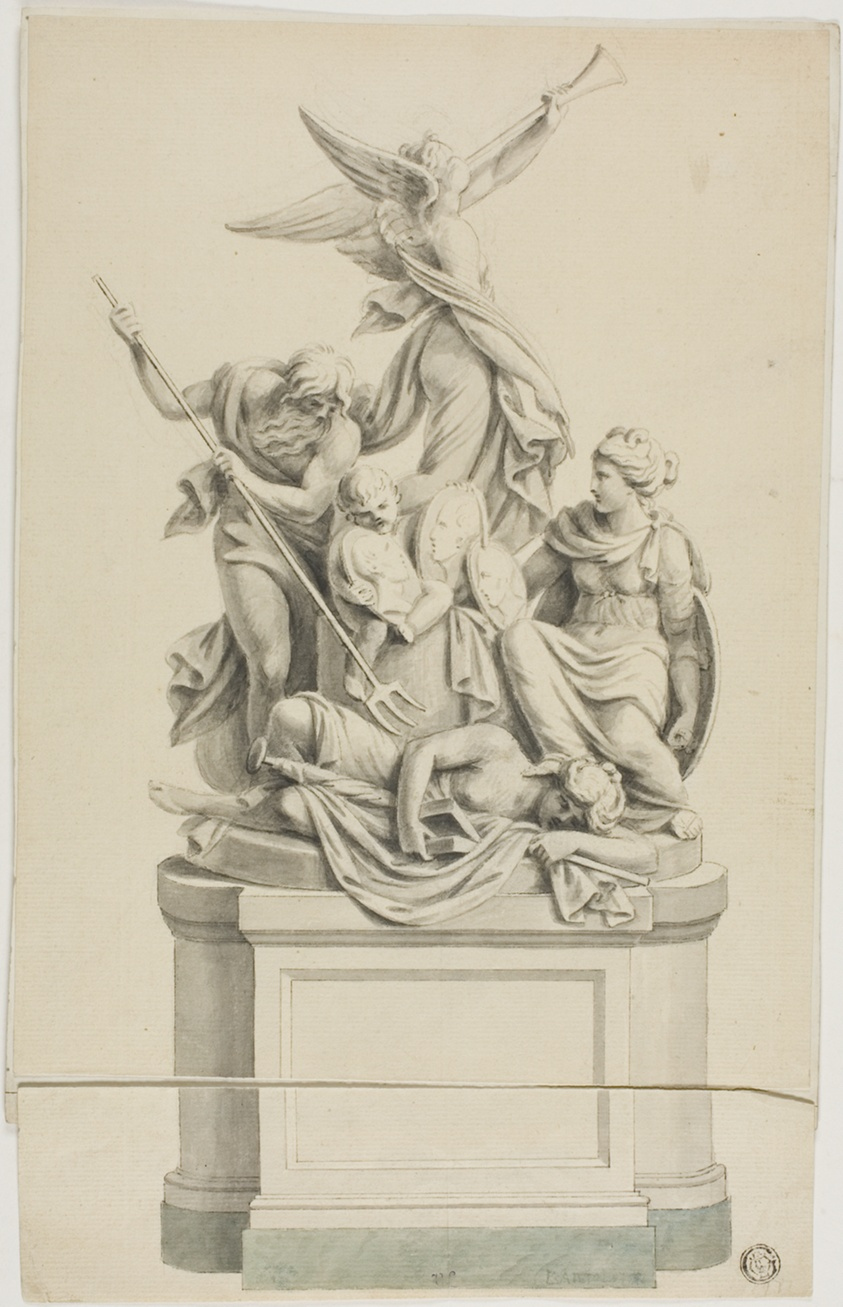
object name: Drawing and Watercolor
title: Funerary Monument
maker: After Francesco Bartolozzi; Italian, 1727-1815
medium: Pen and black ink, with brush and gray wash and blue gouache, over black chalk, on cream laid paper, laid down on ivory wove paper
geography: Italy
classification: pen and ink drawings; paper; drawings (visual works); prints and drawing